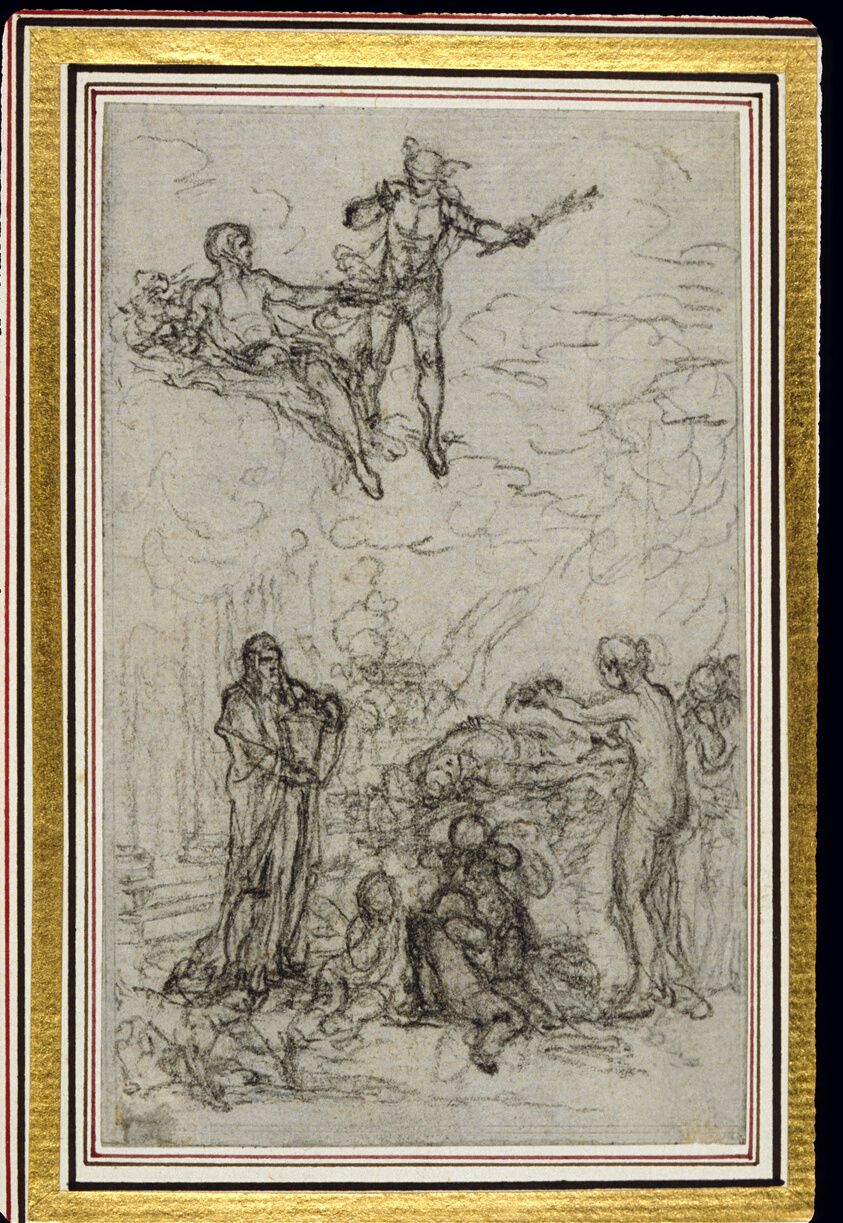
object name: Drawing and Watercolor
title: Study for Vignette in Fontenelle's (attr.) "Les Amours de Mirtil", Canto VI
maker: Hubert François Gravelot (French, 1699-1773)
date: c. 1761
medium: Black chalk, on gray laid paper, laid down on ivory laid paper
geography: France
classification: chalk; drawings (visual works); prints and drawing